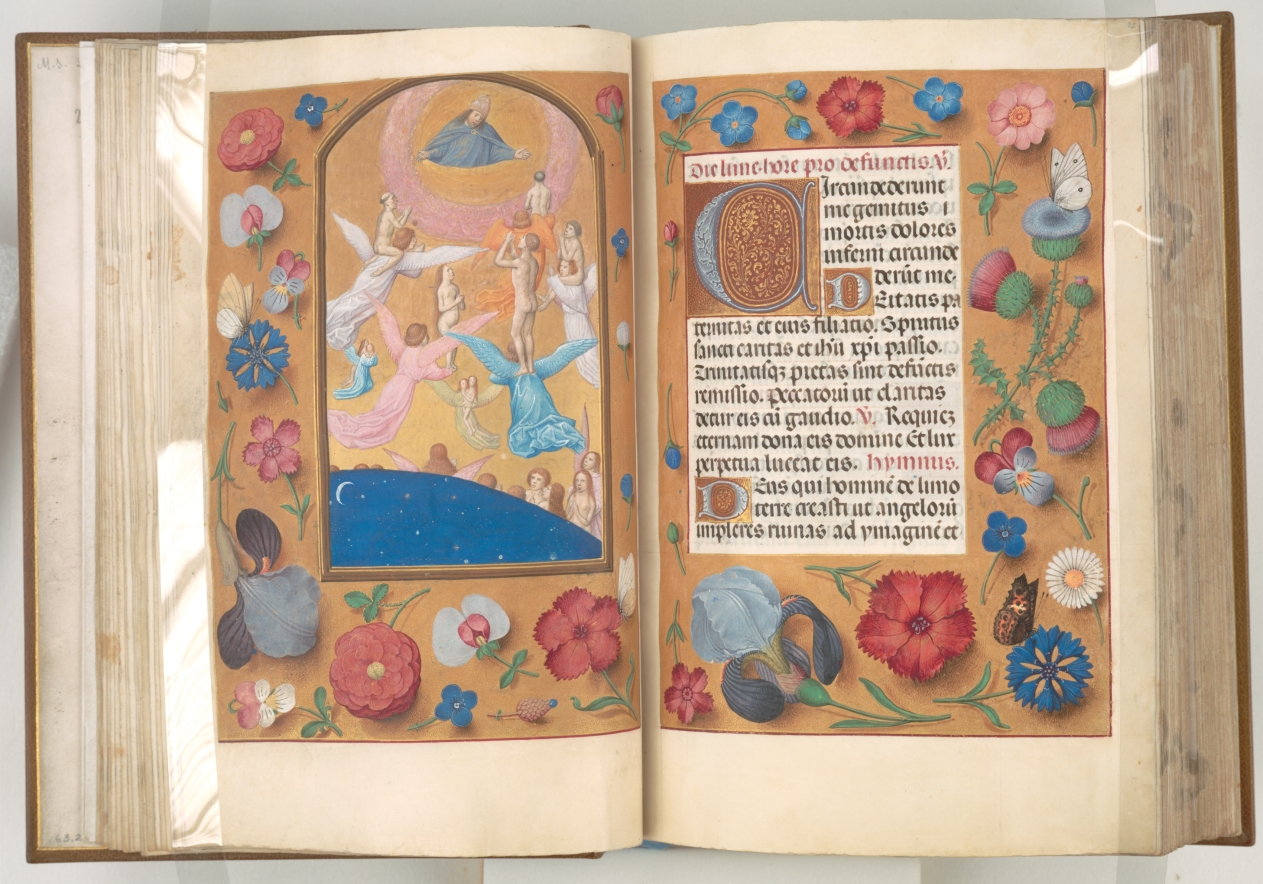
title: Hours of Queen Isabella the Catholic, Queen of Spain: Fol. 25r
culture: Flanders, Ghent and Bruges, late 15th century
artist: Master of the First Prayerbook of Maximillian (Flemish, c. 1444–1519)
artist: and Associates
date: c. 1500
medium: ink, tempera, and gold on vellum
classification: Bound Volume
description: A great lover of Flemish art, Queen Isabella treasured her many devotional books. This deluxe manuscript was created for her private devotions by highly organized and distinctly talented manuscript painters active in Ghent and Bruges. The Ghent-Bruges school represents the culmination of Flemish book painting, whose main features were the use of rich colors, illusionistic effects, a love of landscape, and a strong sense of visual narrative. Manuscripts produced by this circle of artists are renowned for their border decoration featuring a rich variety of realistically painted flowers, scrolling acanthus leaves, birds, and butterflies.